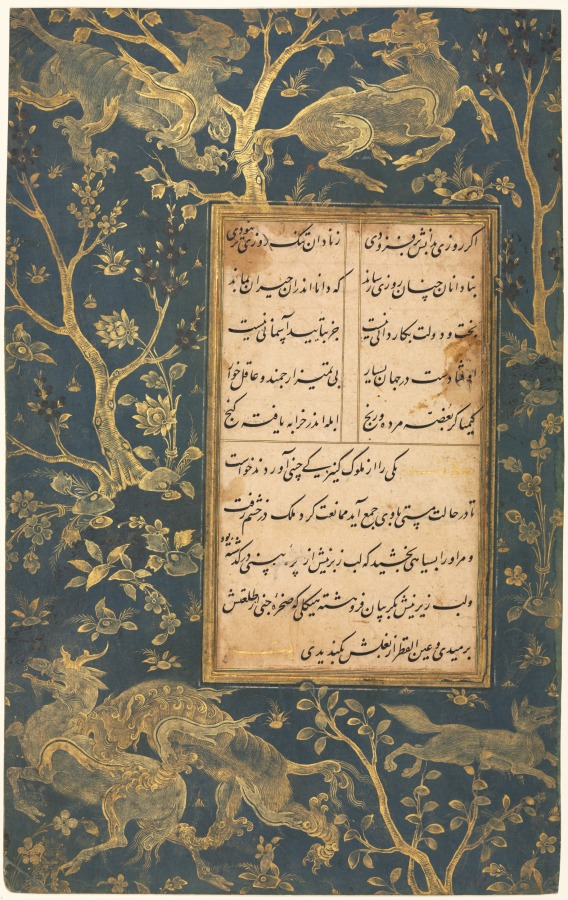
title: Illuminated Folio from a Gulistan (Rose Garden) of Sa'di (c. 1213–1291)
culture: Iran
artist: Sultan 'Ali al-Mashadi (Iranian, 1430–1520)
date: calligraphy: c. 1475–1500; border: c. 1550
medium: Gum tempera, ink, gold, and silver on paper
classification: Manuscript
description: The border scene is set in a magical forest bursting with blossoms. At the top, a winged lion chases a winged deer, who is caught in the bottom border. The imagery of a lion biting down on its prey dates from the Achaemenid period in Iran (550–330 BCE) and references the valor of the king. A fox scurries off to the right. The verse is written in the Persian language using nastaliq script. Sultan ‘Ali Mashadi was widely renowned for perfecting the nastaliq script, and his calligraphy was a model for many followers across the Islamic world.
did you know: The book’s name means “rose garden” in Persian; just as a rose garden is a collection of flowers, the contents are a collection of anecdotes.